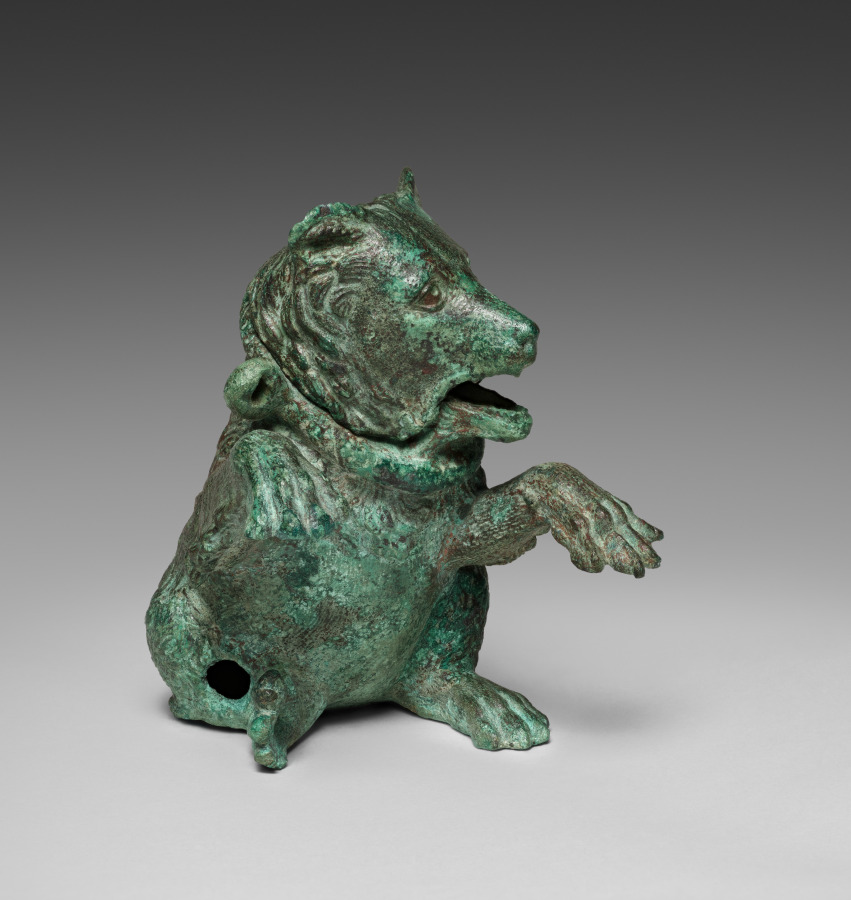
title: Oil Ampulla in the Form of a Dancing Bear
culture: Italy, Roman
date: 200s CE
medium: bronze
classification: Sculpture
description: This bronze bear sits on its hindquarters with its front paws raised, head slightly turned left, and mouth gaping open. It wears a collar around its neck with two rings on either side, where a chain would be passed through to suspend the ampulla. The bear’s head is hinged at the back of the collar to open the vessel, with the lower jaw forming a spout. The eyes were once pierced to prevent an airlock within the ampulla. Bears, like many other animals in antiquity, were used as a form of entertainment, demonstrated here by the bear’s “dancing” pose.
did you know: This ampulla was likely used to carry oil to the baths in antiquity.